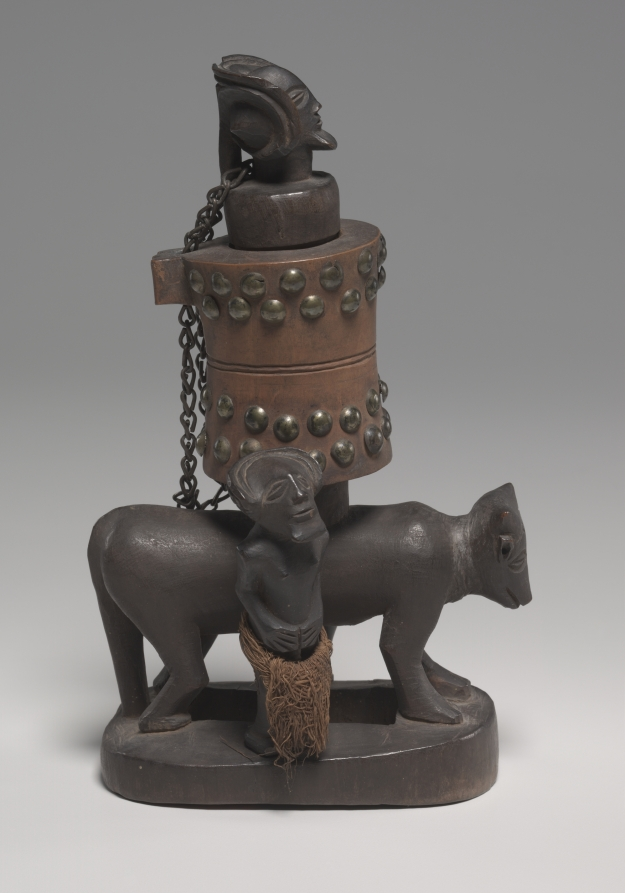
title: Snuff Mortar (Tesa Ya Ma Kanya)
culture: Africa, Central Africa, Angola or Democratic Republic of Congo, Chokwe carver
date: late 1800s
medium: Wood, upholstery studs, cloth, and metal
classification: Tool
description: Tobacco, introduced into Africa in the 16th century, became the prerogative of leaders. As patrons of the arts, Chokwe chiefs commissioned elaborate pipes and mortars as part of their court regalia for display during public gatherings.